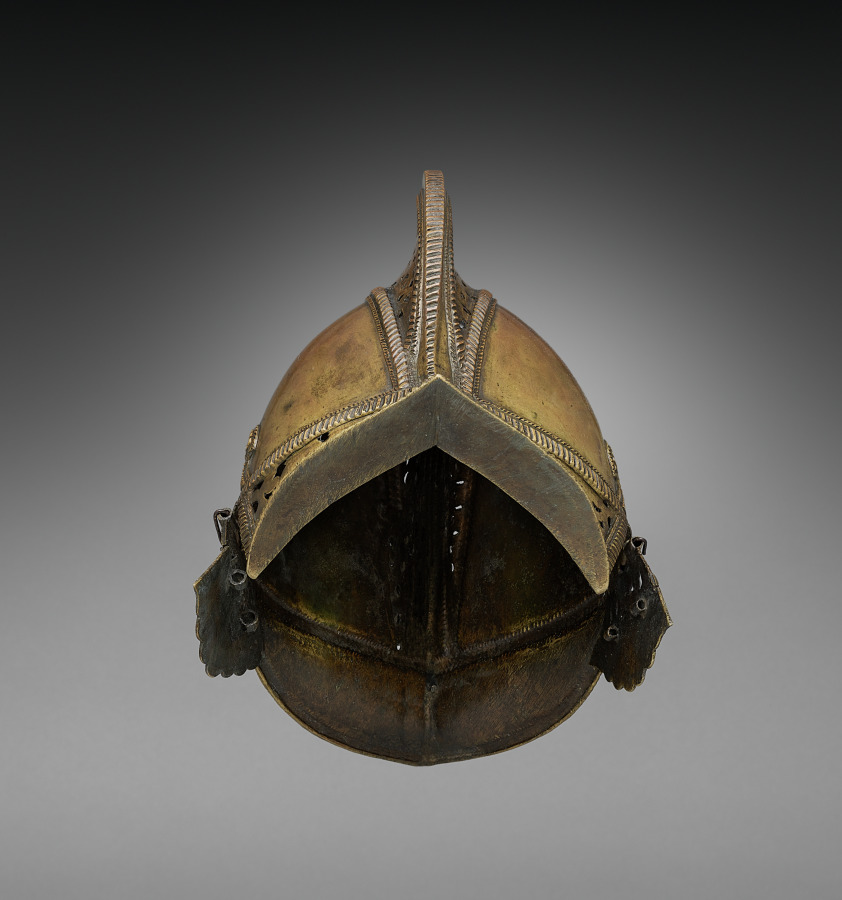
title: Helmet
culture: Philippines, Mindanao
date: 1800s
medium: Brass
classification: Arms and Armor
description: The predominantly Muslim Maranao people of the southern Philippines developed a rich material culture—including brass work, textiles, weaponry, and architecture—commonly featuring a curvilinear, geometric ornament known as okir. This helmet, while based on Spanish types, features filigree vents and openwork embellishment that are distinctively Mindanao. The top might once have been decorated with feathers or other ornaments.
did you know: Bacolod, the traditional homeland of the Maranao people, is a historic pangampong (fortified settlement) on Lake Lanao.